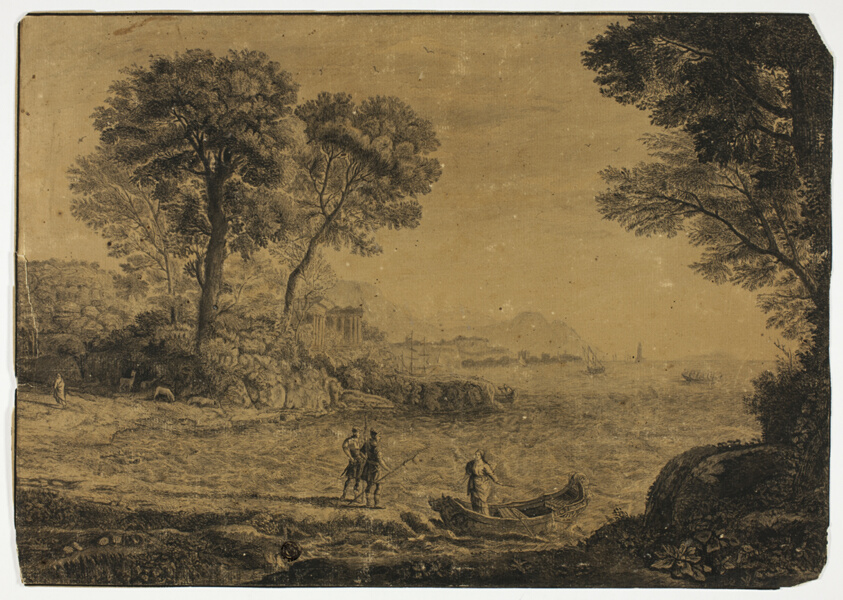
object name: Drawing and Watercolor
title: Seascape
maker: After Claude Lorrain; French, 1600-1682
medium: Pen and black ink and brush and gray wash on tan laid paper, laid down on tan laid card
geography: France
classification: drawings (visual works); pen and ink drawings; paper; brush and wash; prints and drawing